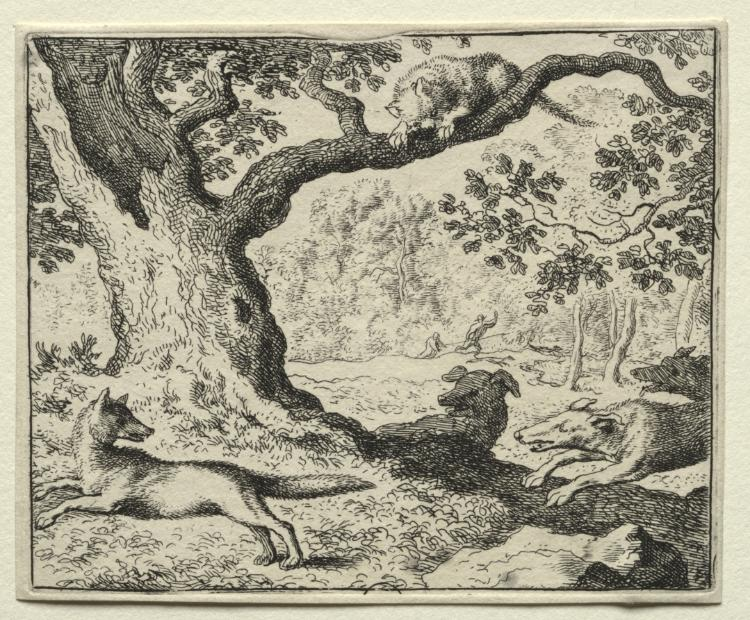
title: Reynard the Fox: The Disloyal Cat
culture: Netherlands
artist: Allart van Everdingen (Dutch, 1621–1675)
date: 1650–75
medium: etching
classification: Print